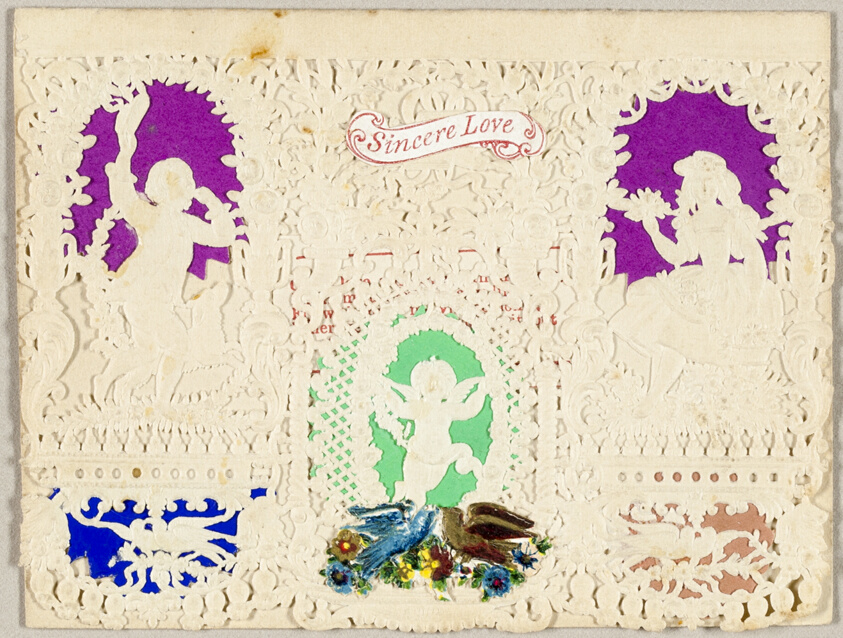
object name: Drawing and Watercolor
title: Sincere Love (valentine)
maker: Thomas Wood (English, 19th century)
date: c. 1850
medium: Collaged elements on cut and embossed (designed) ivory wove paper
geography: England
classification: collage; valentine; prints and drawing; paper